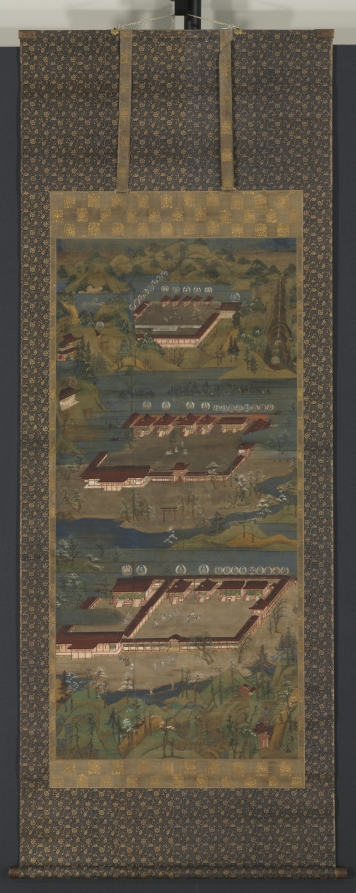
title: Mandala of the Three Shrines at Kumano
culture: Japan, Kamakura period (1185–1333) to Nanbokuchō period (1336–92)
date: 1300s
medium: hanging scroll; ink and color on silk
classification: Painting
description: This painting depicts the three shrines of Kumano from a bird’s-eye perspective, with the Buddhist counterparts of the kami of each shrine hall shown in discs directly above the halls. It also features figures, both pilgrims and deities, along the pilgrimage route and at the shrines. It is the only surviving work illustrating architectural representations of all three shrines in the same painting. They are compressed into a stacked composition, with the Nachi shrine at the top, the Shingū in the middle, and the Hongū at the bottom.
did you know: The sacred waterfall at the top right of the painting is called Nachi.